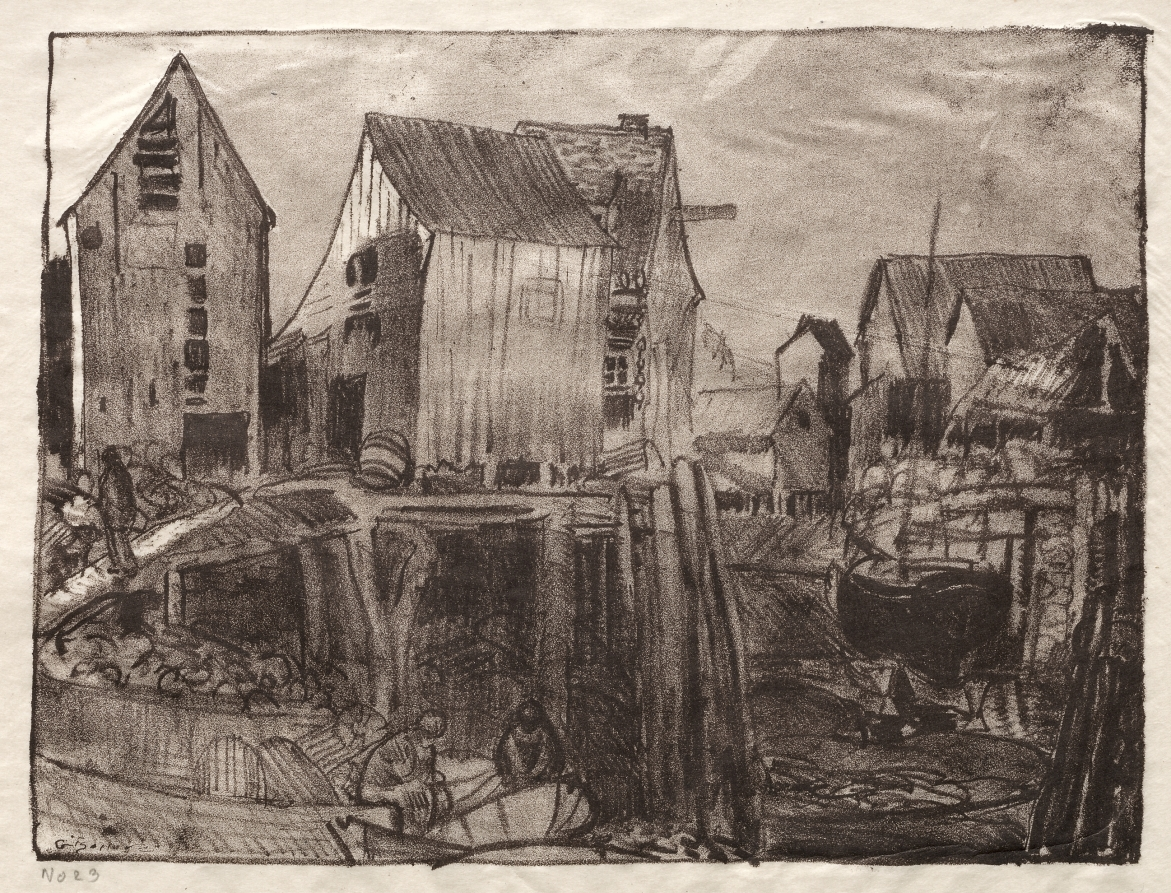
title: Matinicus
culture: America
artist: George Bellows (American, 1882–1925)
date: 1916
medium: lithograph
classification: Print